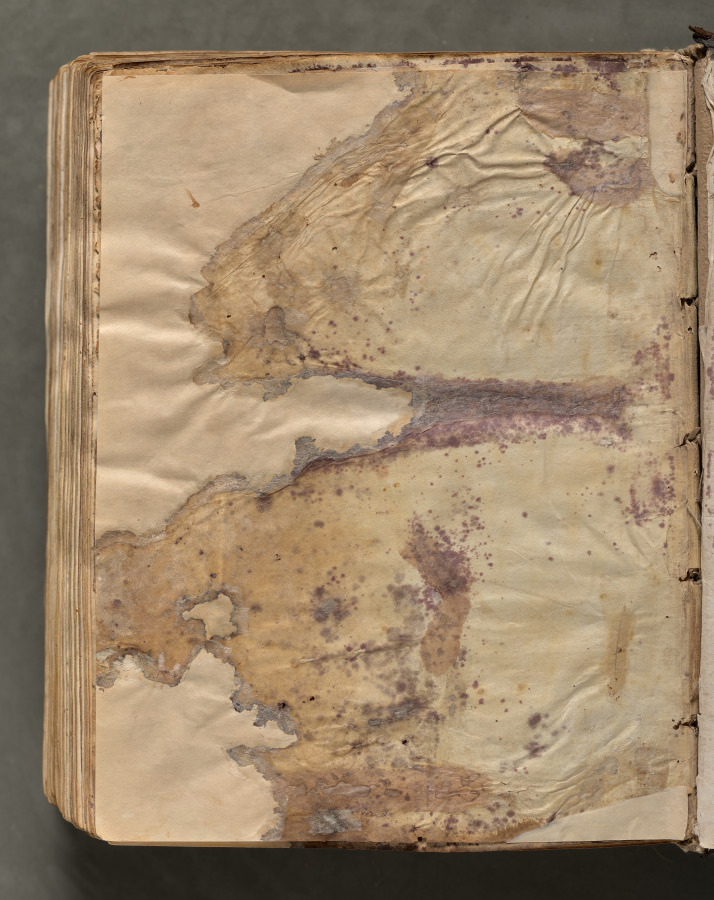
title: Text, folio 427 (verso), from a Gospel Book with Commentaries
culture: Byzantium, Constantinople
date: c. 1000–1100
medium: ink, tempera, and gold on vellum; leather binding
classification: Bound Volume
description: Each of the four gospels in this book opens on a page with brilliantly illuminated borders depicting the author of the text as well as birds—principally peacocks, symbols of the immortality of the soul—and fountains, representing the fountain of life and the salvation of the soul. This volume consists of 428 leaves with texts in Greek. Its level of sophistication suggests that it was probably written and decorated in a monastery in Constantinople.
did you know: Gospel books were carried in procession through Byzantine churches.